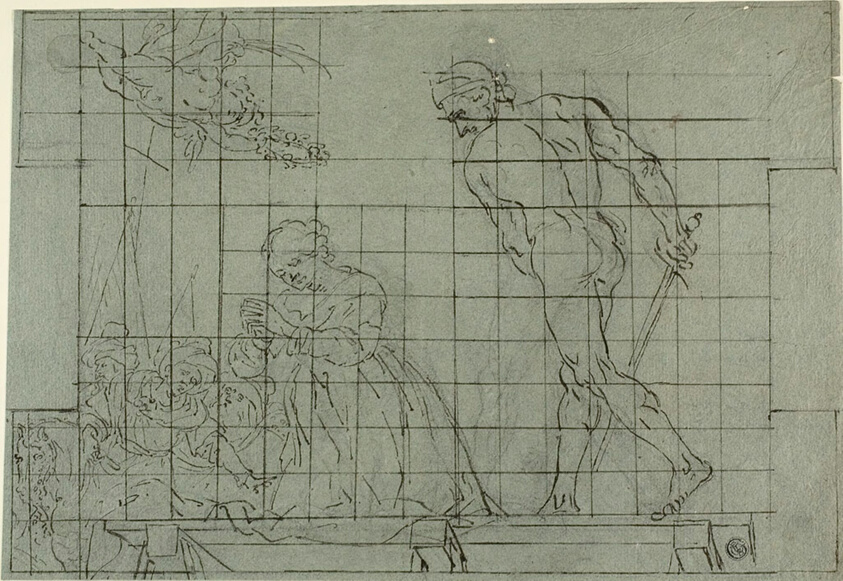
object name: Drawing and Watercolor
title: Beheading of a Female Saint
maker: Unknown Artist; Italian, 17th century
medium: Pen and black ink, over traces of black chalk, on blue-gray laid paper, squared in black ink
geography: Italy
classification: drawings (visual works); prints and drawing